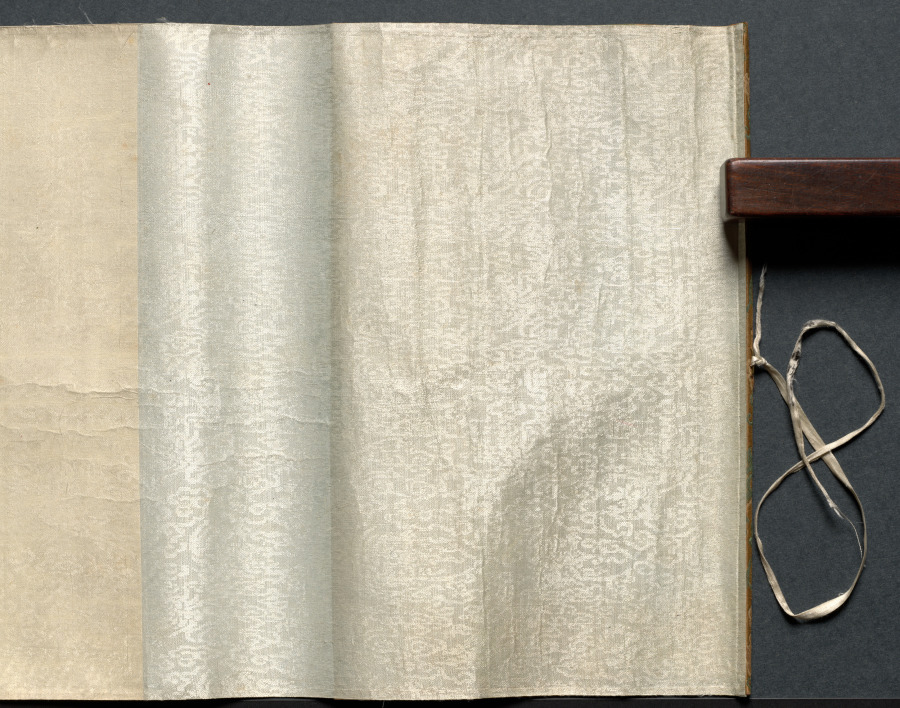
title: Rocks, Orchid, and Bamboo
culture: China, Qing dynasty (1644-1911)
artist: Shitao (Chinese, 1642–1707)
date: 1662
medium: handscroll; ink on paper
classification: Painting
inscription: Title colophon in four characters with signature and two seals on gold-flecked paper.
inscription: Artist's signature, inscription (with date of 1662), five seals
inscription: Colophon with two seals.